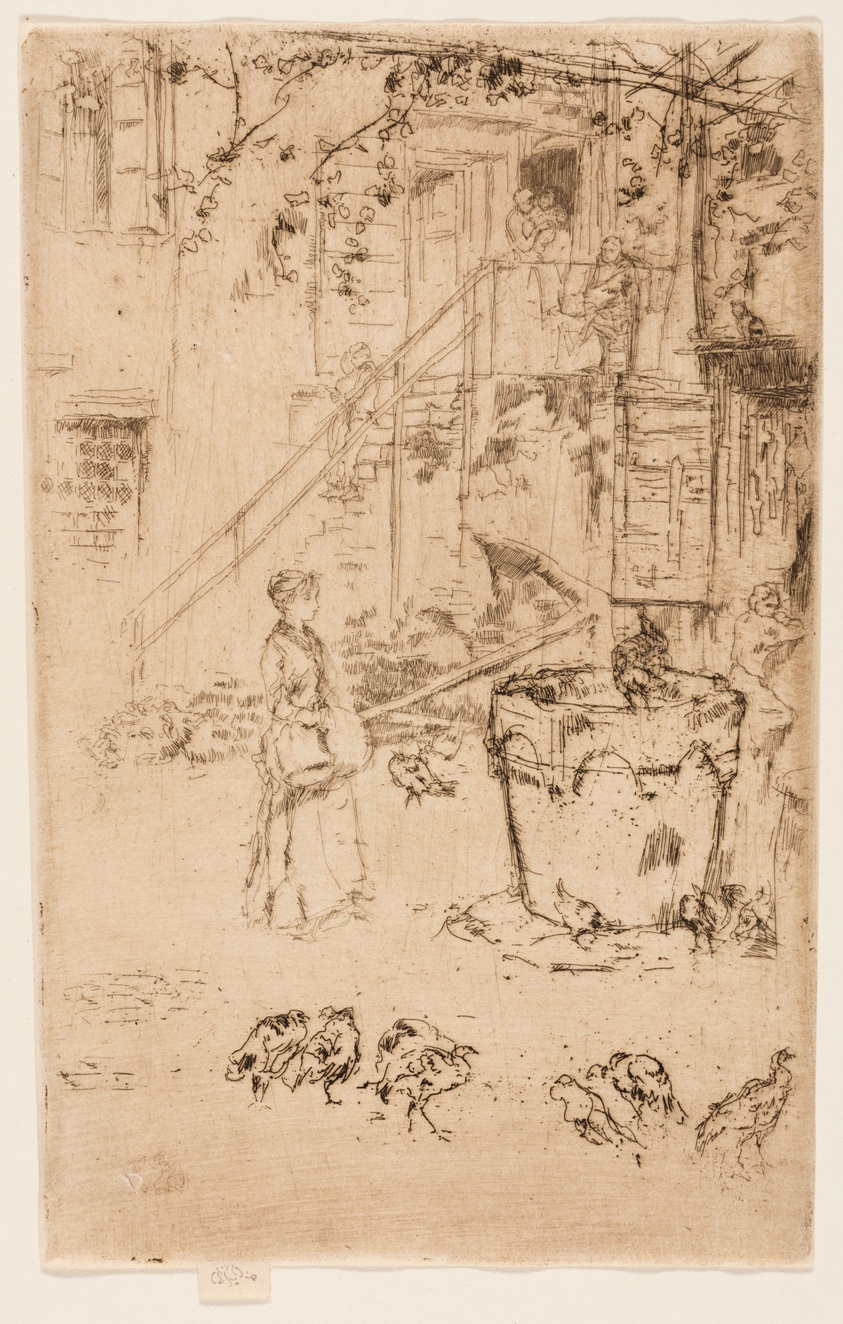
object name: Print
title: Turkeys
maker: James McNeill Whistler (American, 1834-1903)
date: 1880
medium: Etching and drypoint with foul biting in dark brown ink on cream laid paper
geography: United States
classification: etching; drypoint; foul biting; print; prints and drawing; paper